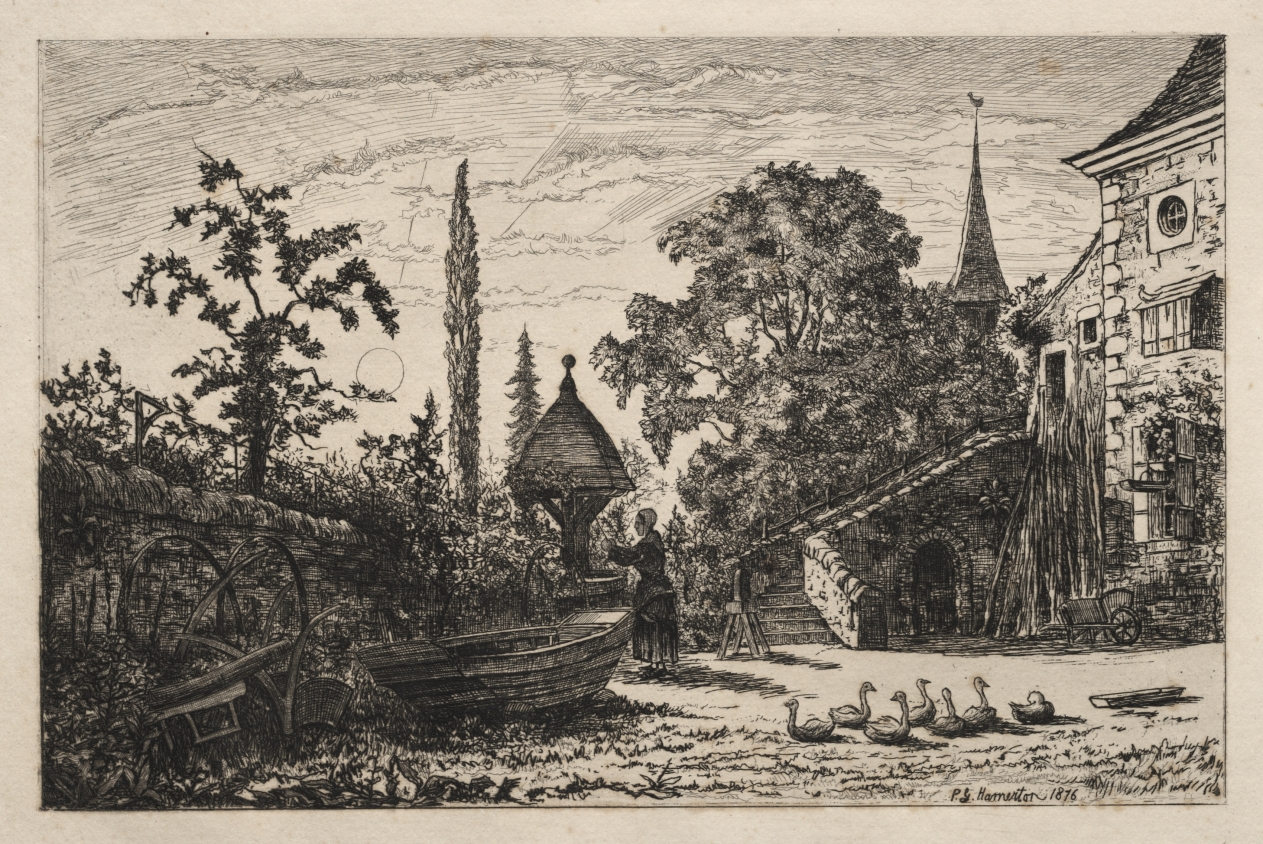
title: The Courtyard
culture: England, 19th century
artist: Philip Gilbert Hamerton (British, 1834–1894)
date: 1876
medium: etching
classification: Print